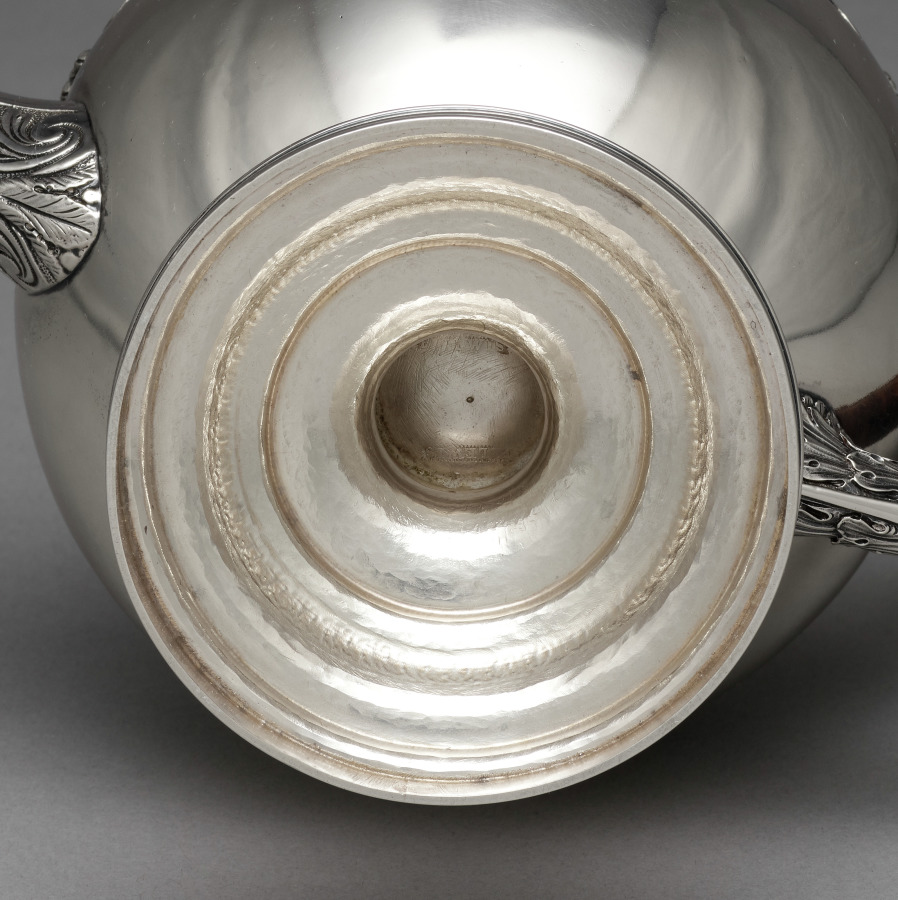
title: Covered Pot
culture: America, Pennsylvania, Philadelphia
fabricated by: Harvey Lewis (American, 1835)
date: c. 1811–25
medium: silver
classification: Silver